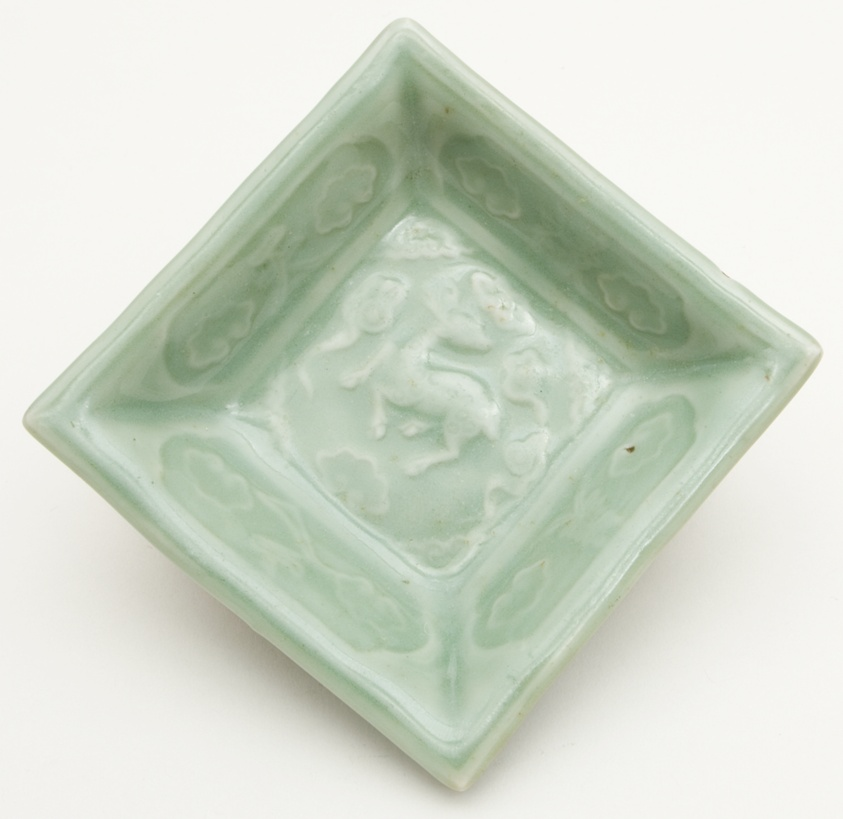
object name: Vessel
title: Square Dish with Symbols of Longevity and Immortality (Deer, Bats, Fungus, and Clouds) and the Phrase Tian Zhi Mei Lu (Beauty of Heavenly Prosperity)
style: Chinese (culture or style)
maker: China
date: Yuan dynasty (1271–1368)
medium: Longquan ware; stoneware with underglaze molded decoration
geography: China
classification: dish (vessel); vessel